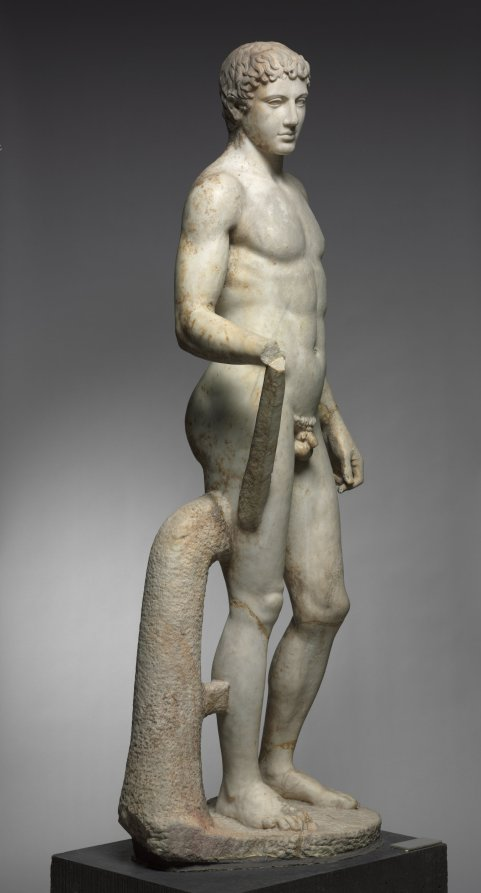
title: Statue of an Athlete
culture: Italy, Roman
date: 1–100 CE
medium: marble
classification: Sculpture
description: This idealized athlete recalls Greek sculptural types invented and popularized during the 400s BC. Large-scale athletes and other sculptures like this were originally created by famous artists as sanctuary dedications. Centuries later, they were widely copied and adapted by Roman sculptors, whose clients sought their own versions of earlier masterpieces. Working in marble rather than bronze, these sculptors added certain elements for stability, such as the struts and the large tree trunk beside the right leg here. Sculptures like this one are profoundly complex, made by and for Romans but descended from Greek ancestors.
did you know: For many years, this sculpture stood in the rotunda of the Cleveland Museum of Art.